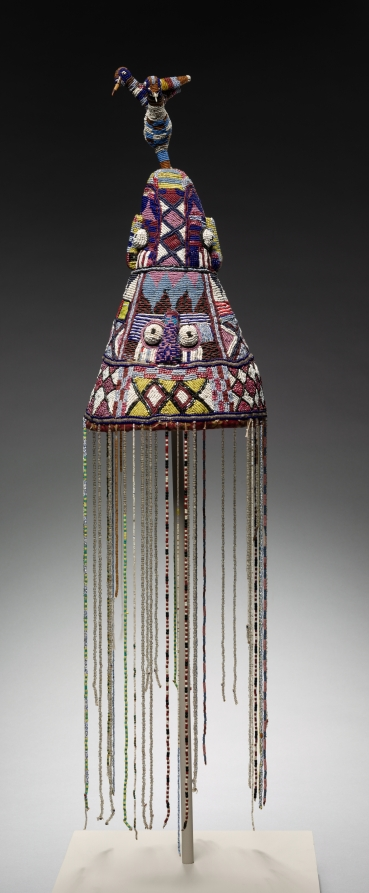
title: Crown (adéńlá)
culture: Africa, West Africa, Nigeria, Yorùbá-style maker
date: 1900s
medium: Cloth (probably cotton and wool), glass beads, reeds, cardboard, wood, plant fiber, cotton, and quills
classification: Garment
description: The most important of all regalia, topped with the "royal bird" Okin, this headdress connects the king to Oduduwa, the mythical founder of the Yoruba. The veil of beaded strings masks the identity of the wearer and protects his subjects from the supernatural powers that radiate from his face. The crown also signifies the "inner head" of the king, the locus of an awesome life force called ase.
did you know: No one––not even the king who wears it––is allowed to look inside this crown, as that's where it is most powerful.